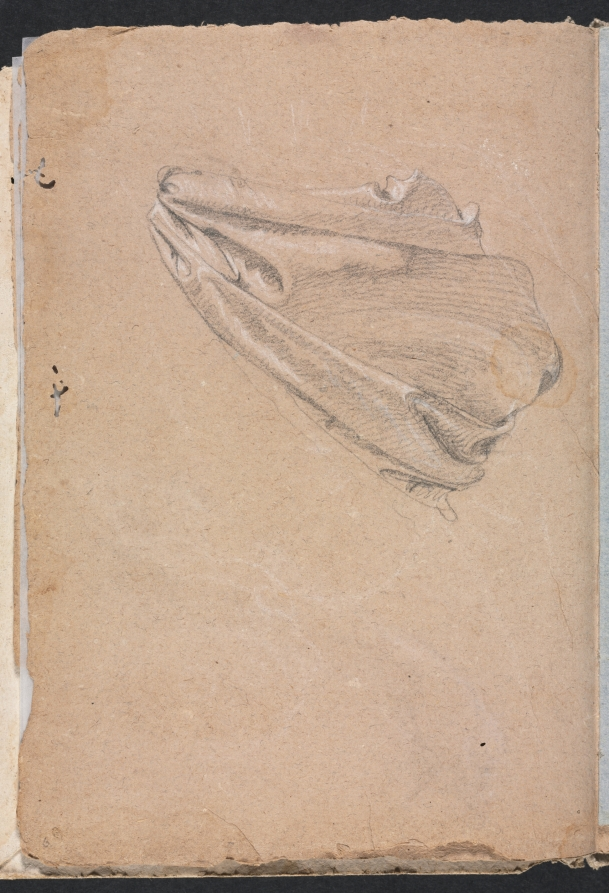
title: Verona Sketchbook: Drapery study (page 6)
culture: Italy, 18th century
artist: Francesco Lorenzi (Italian, 1723–1787)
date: 1760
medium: black chalk with white heightening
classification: Bound Volume